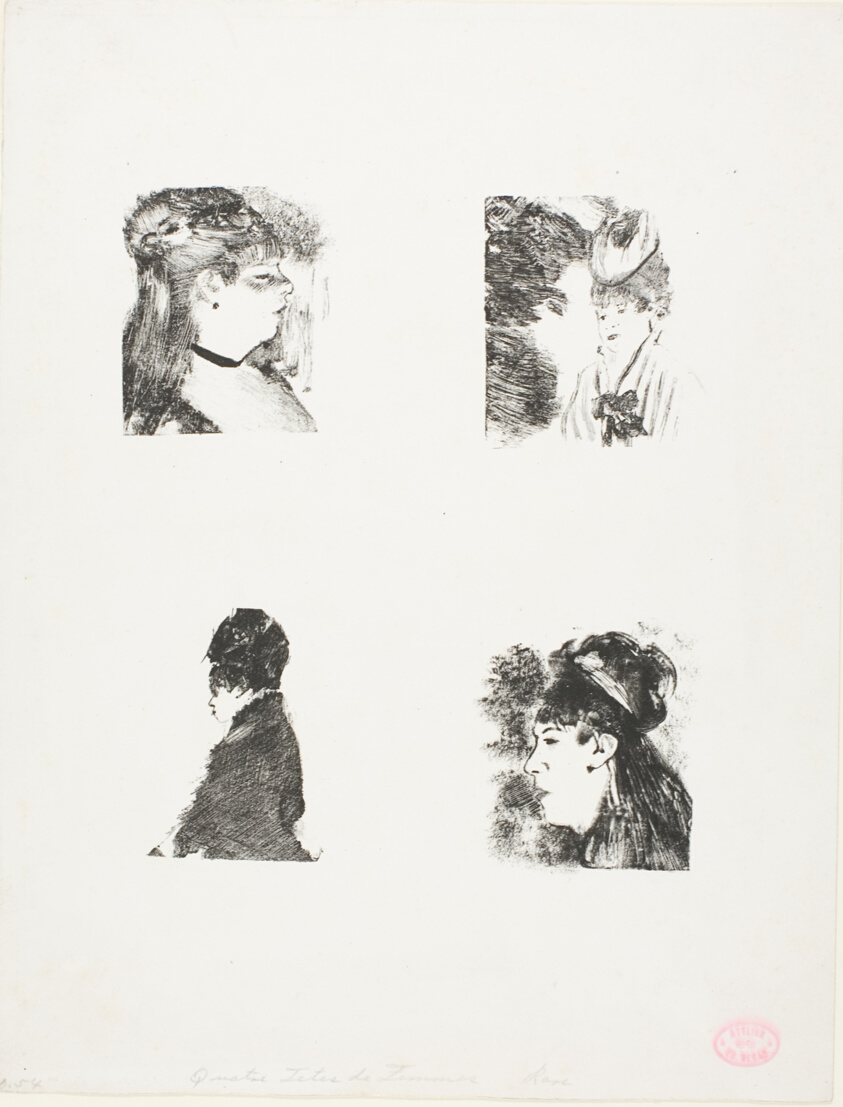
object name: Print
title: Four Heads of Women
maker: Edgar Degas; French, 1834-1917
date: 1876–77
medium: Lithograph in black on off-white wove paper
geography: France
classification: lithograph; print; prints and drawing; paper